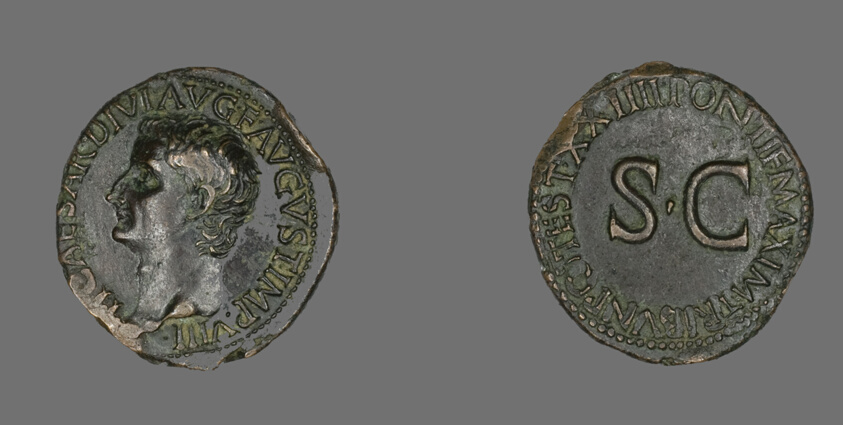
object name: Coin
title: Dupondius (Coin) Portraying Emperor Tiberius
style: roman (ancient, style or period)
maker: Roman, minted in Rome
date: 22-23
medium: Bronze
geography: Roman Empire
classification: coin; ancient art